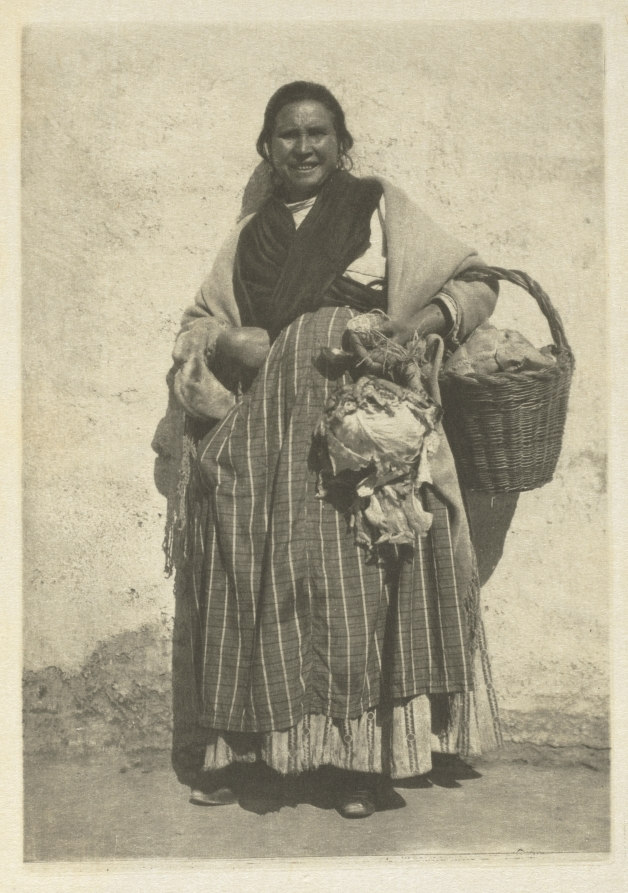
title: Camera Work: A Gitana - Granada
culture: England, 20th century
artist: J. Craig Annan (British, 1864–1946)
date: 1914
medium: photogravure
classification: Bound Volume